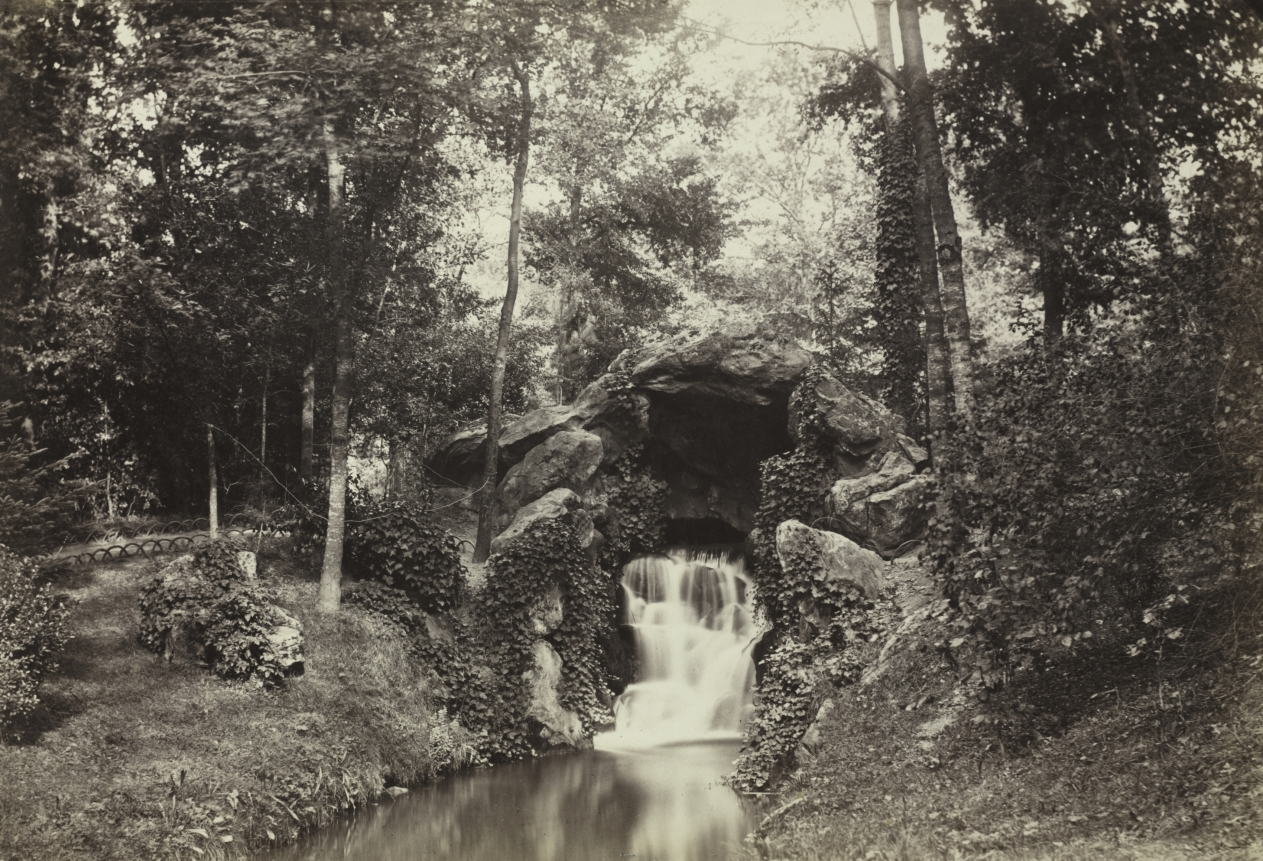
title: View of the Small Grotto toward the Deer Pond, Bois de Boulogne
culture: France, 19th century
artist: Charles Marville (French, 1813–1879)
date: 1858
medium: albumen print from wet collodion negative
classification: Photograph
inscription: Written in pencil [erased] on recto: "No 46"; written in pencil on verso: "F2 [crossed out] / H2 / L2"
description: Although better known for his architectural photographs of Paris, Marville also produced magical landscapes like this image. Carefully composed, the asymmetrical composition presents a picturesque scene of a waterfall flowing from a mound of boulders in the Bois de Boulogne, a forest annexed as a Parisian city park in 1852. The sunlight filtering through the foliage creates a remarkable range of tonal and textural detail, along with lively abstract patterns of light and shadow. Trained as a painter, lithographer, and engraver, Marville took up photography around 1850. He was named official photographer of Paris in 1862 and documented the buildings and neighborhoods ultimately destroyed when the boulevards and open spaces of modern Paris were built in the late 19th century.